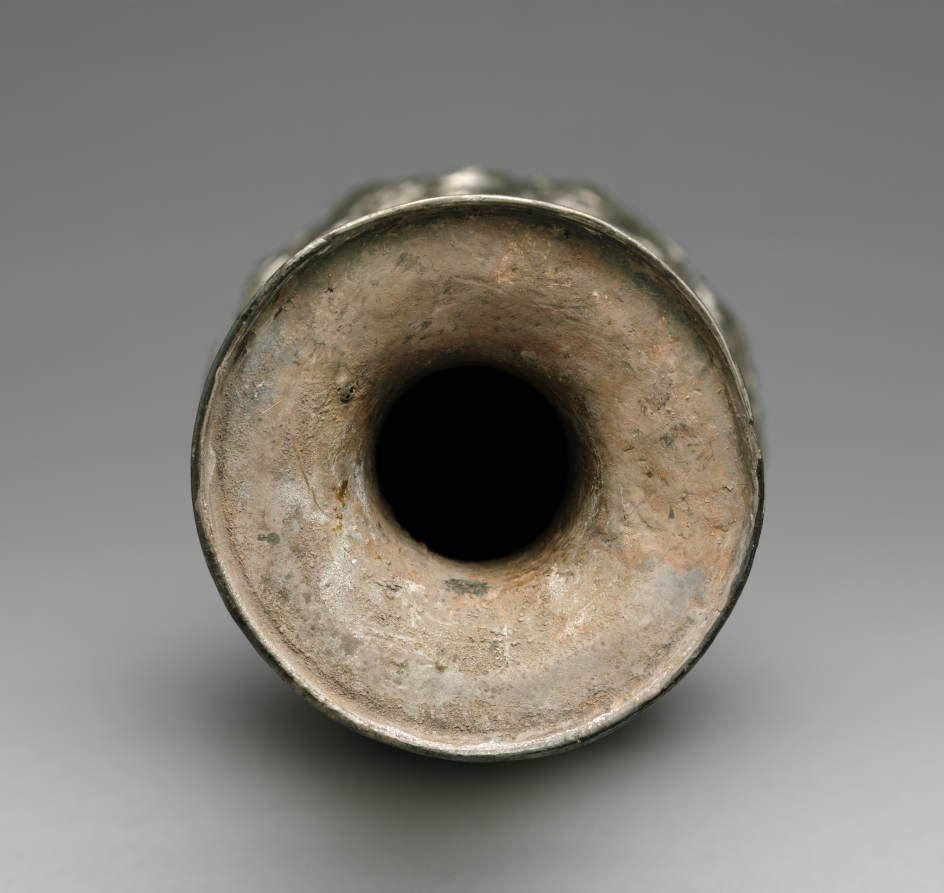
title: Ewer (Pitcher) with Game, Seafood, and Wine Scenes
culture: Byzantium, Syria(?), Byzantine period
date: late 300s CE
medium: silver with traces of gilding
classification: Metalwork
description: This magnificent pitcher, called a ewer, was almost certainly meant for serving wine in the dining room of a wealthy home. On its surface are images in three bands representing the expected bounty of the hunt. Deer pursued by a lioness and hares chased by dogs appear in the top band, signifying the wealth of game the owner hoped to have on the family table. In the lowest band are edible sea creatures, while the center features the merry followers of the Roman wine god Bacchus (Dionysos in Greek).